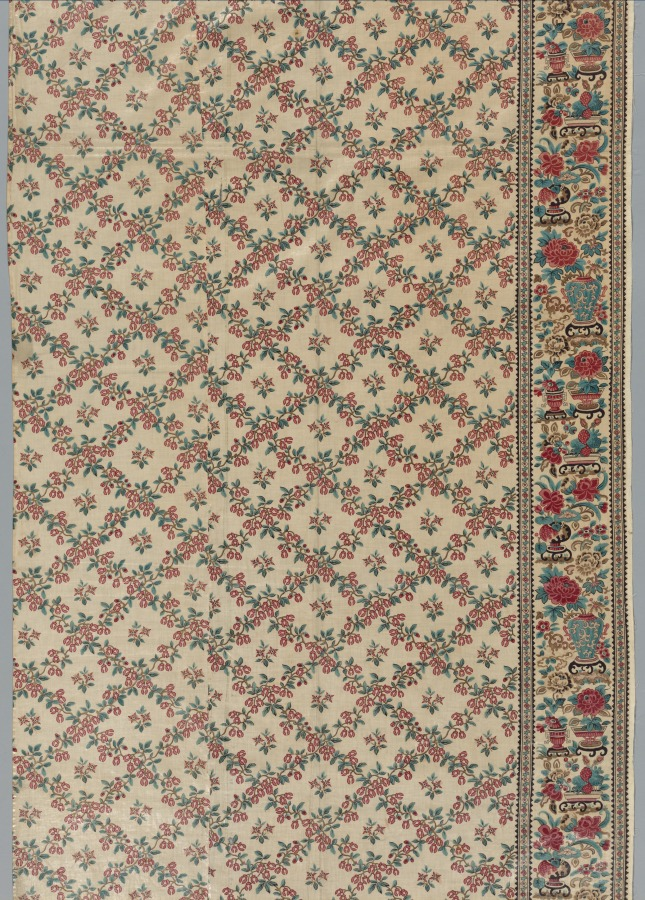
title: Roller-Printed Glazed Chintz with Flower and Vase Design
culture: England, 19th century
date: 1800s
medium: roller printed cotton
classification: Textile